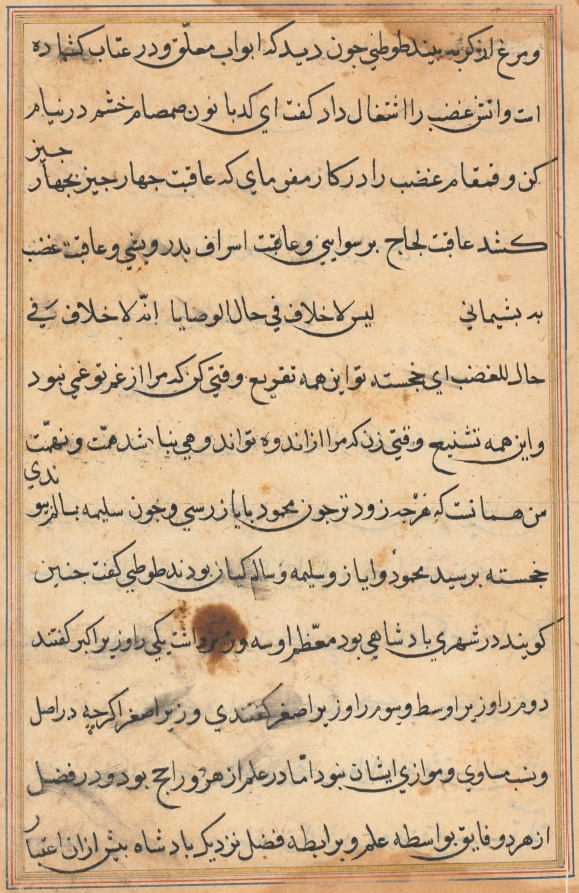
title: Page from Tales of a Parrot (Tuti-nama): text page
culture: Mughal India, court of Akbar (reigned 1556–1605)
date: c. 1560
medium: gum tempera, ink, and gold on paper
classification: Painting